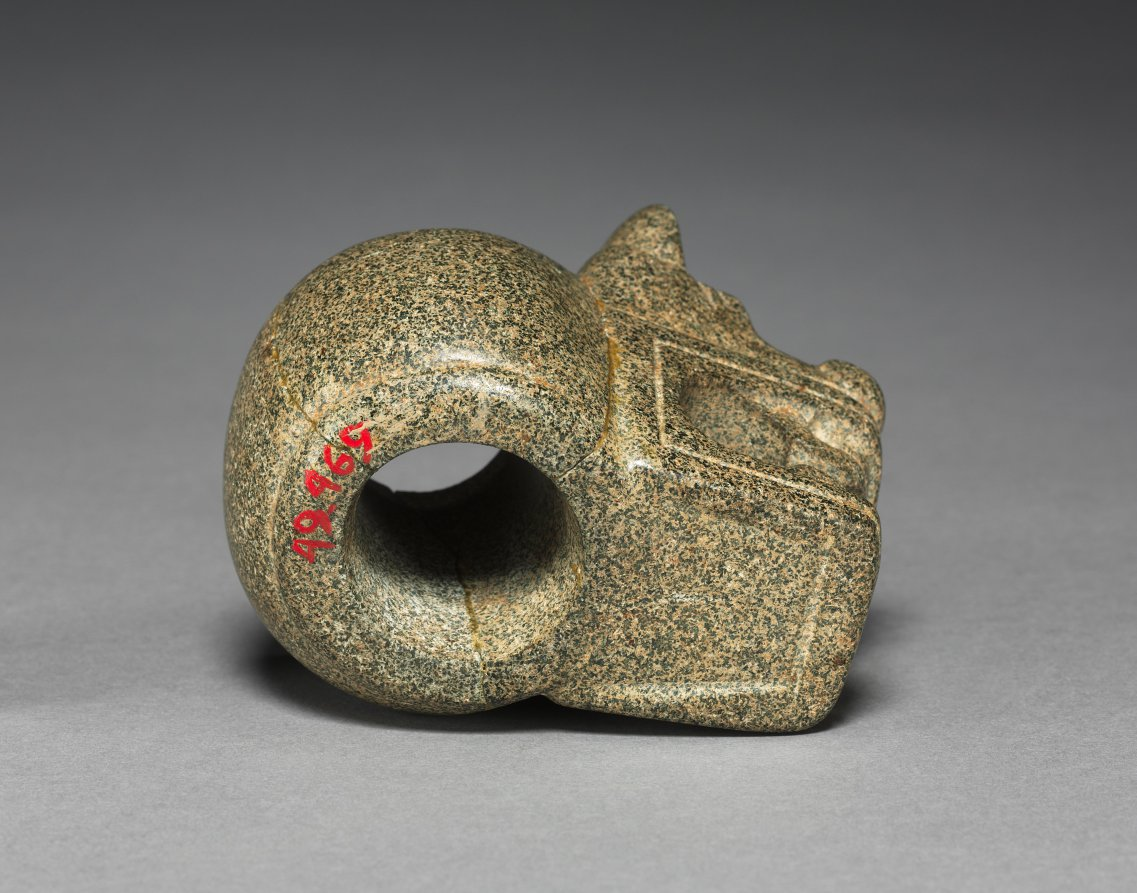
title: Ceremonial Mace (Club) Head: Feline (Jaguar?)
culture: Costa Rica, Southern Nicoya region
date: c. 300 BCE–600 CE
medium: stone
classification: Stone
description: Probably once mounted on wooden shafts, these objects could have served as symbols of chiefly authority, group insignia, the heads of ceremonial weapons, or all three. They eventually were placed in elite graves. The bird may be a male curassow and the feline, a jaguar.